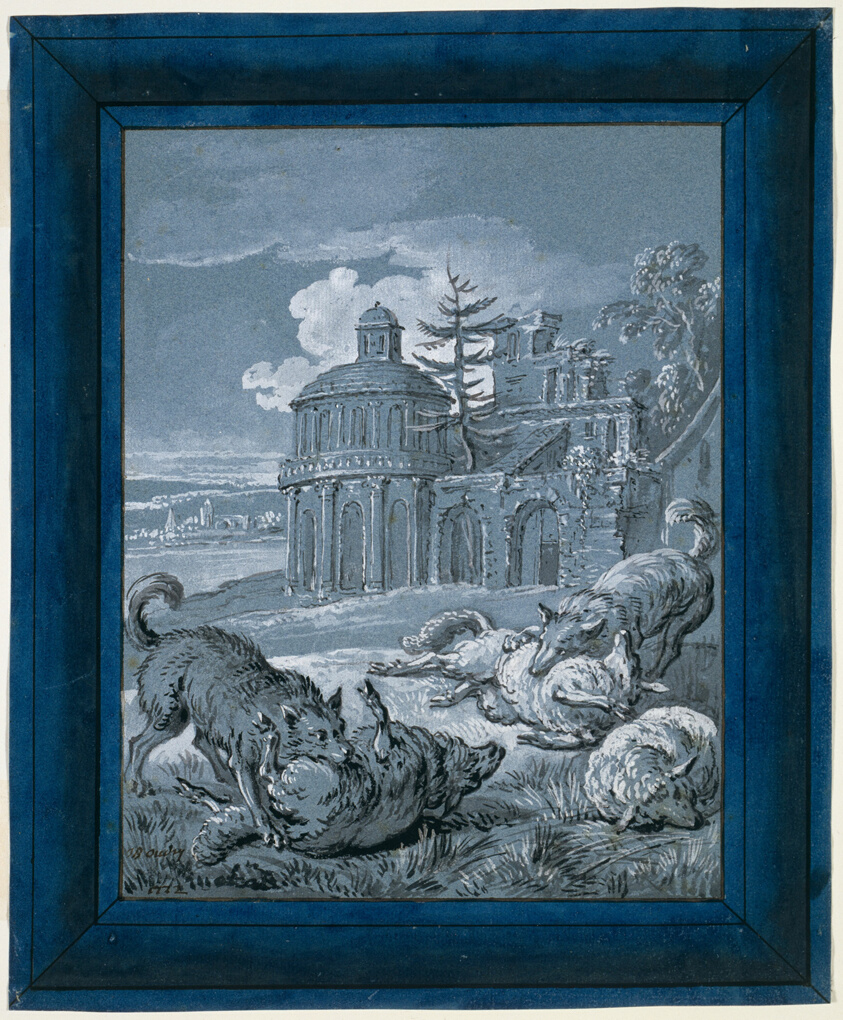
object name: Drawing and Watercolor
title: Wolves Attacking Sheep ("Rein de Trop II")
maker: Jean-Baptiste Oudry (French, 1686-1755)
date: 1732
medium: Pen and brush and black ink, with brush and gray wash and black-and-white gouache, on blue laid paper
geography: France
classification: pen and ink drawings; drawings (visual works); prints and drawing